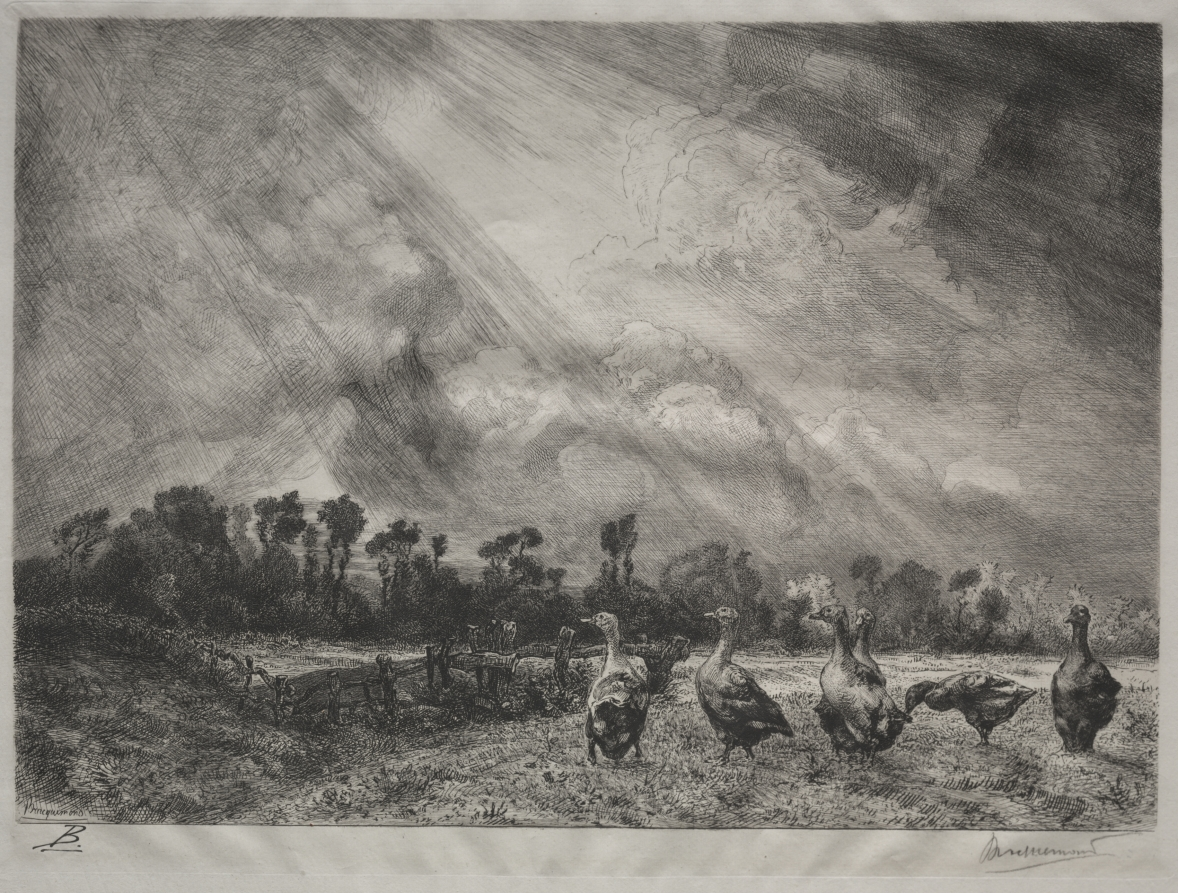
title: The Storm Cloud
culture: France, 19th century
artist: Félix Bracquemond (French, 1833–1914)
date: 1878–1887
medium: etching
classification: Print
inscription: signed, lower right, in graphite: Bracquemond; lower left, in plate: Bracquemond; lower left, in plate: B.